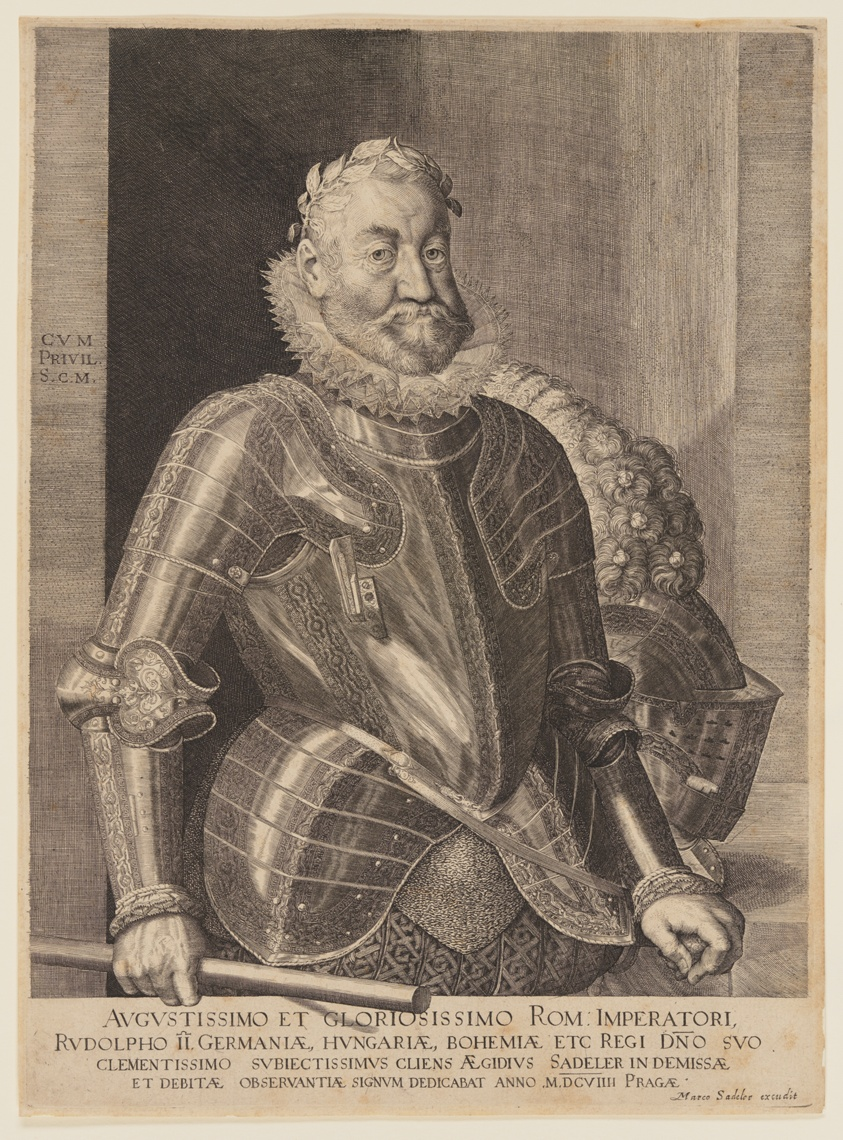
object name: Print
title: Rudolph II, Holy Roman Emperor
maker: Aegidius Sadeler II; Flemish, c. 1570–1629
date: 1609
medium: Engraving on ivory laid paper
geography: Flanders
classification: engraving; paper; print; prints and drawing